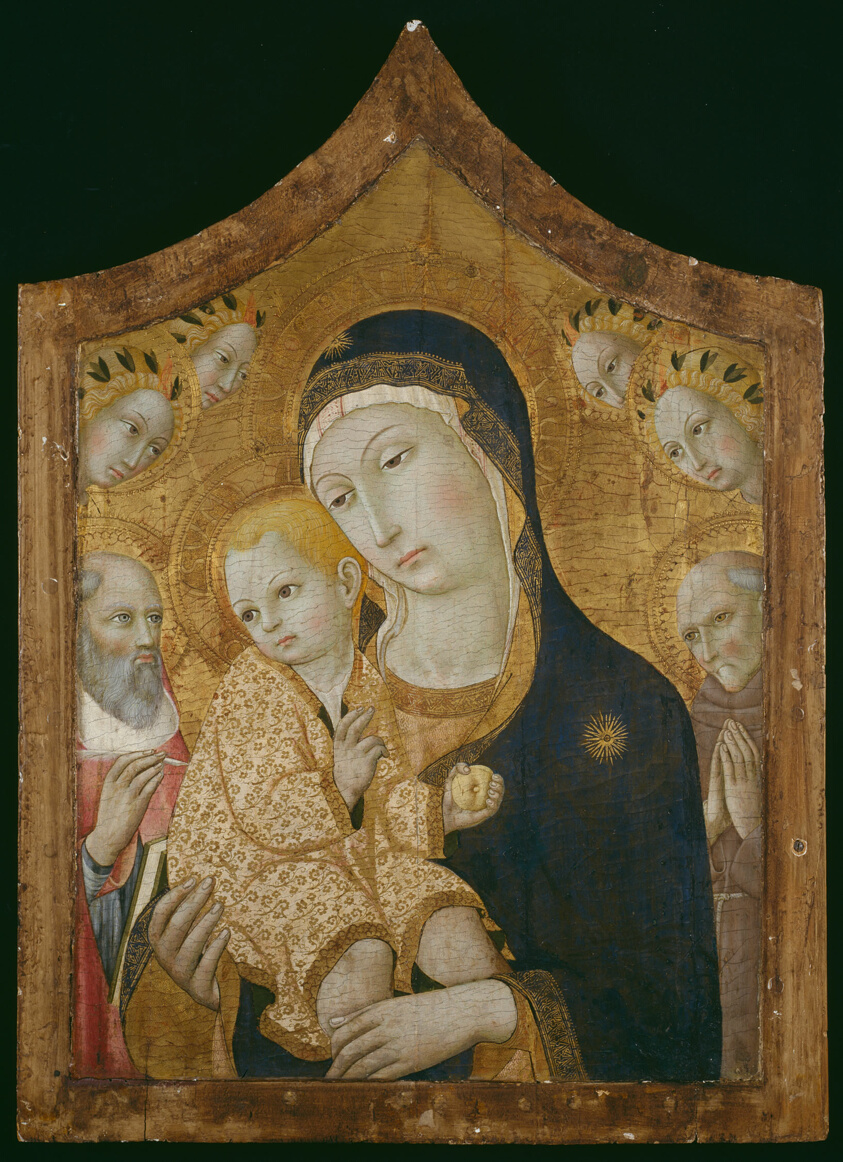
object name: Painting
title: Virgin and Child with Saints Jerome, Bernardino of Siena, and Angels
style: 15th century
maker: Sano di Pietro (Italian, 1405–1481)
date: 1450/60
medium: Tempera on panel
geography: Italy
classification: painting; tempera; paint; Italian; european painting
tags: Century of Progress, Virgin and child/Madonna and child, saints, angels, mother and child, mother, children, babies, Jesus, Virgin Mary, woman, woman with children, men, religion, religious, religious figures, religious scenes, Christian subjects, Christianity, world's fairs, Chicago World's Fairs